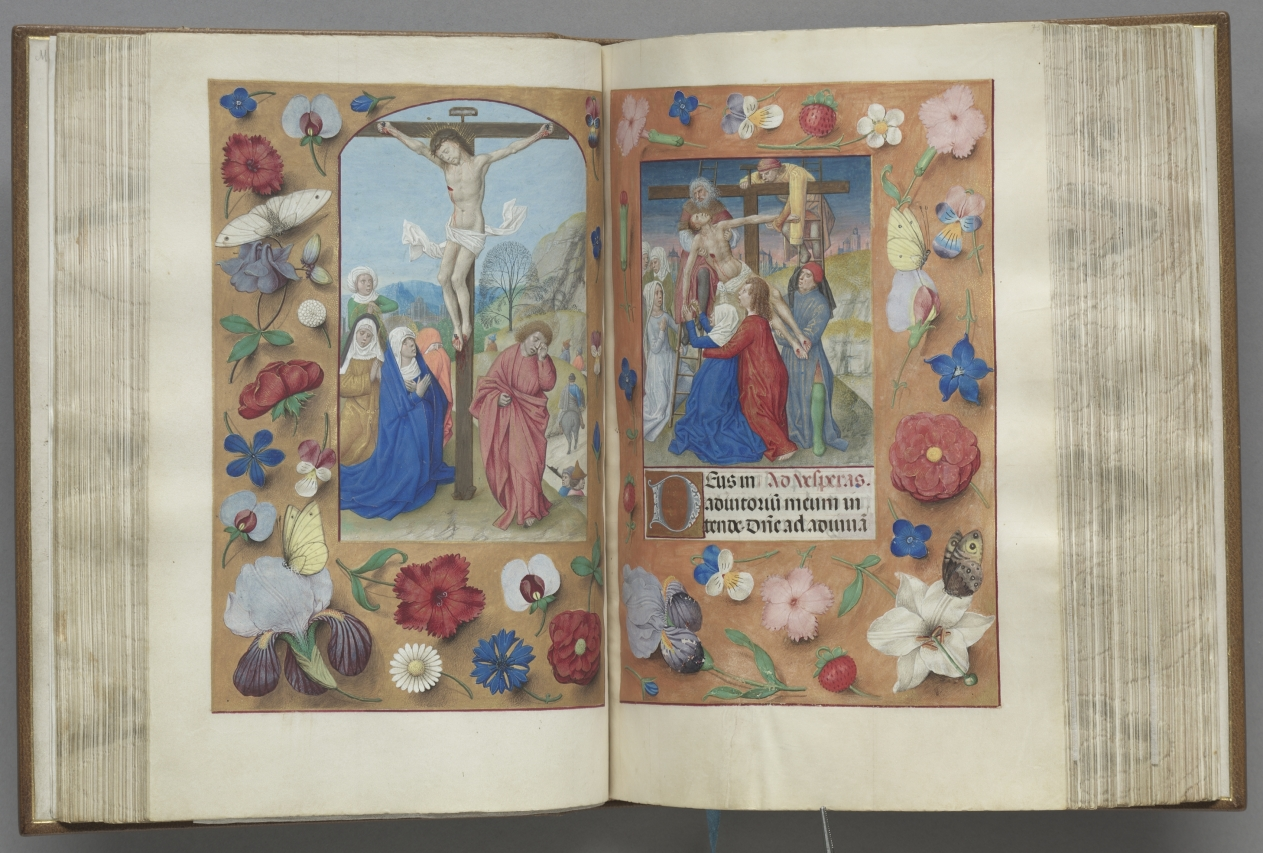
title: Hours of Queen Isabella the Catholic, Queen of Spain: Fol. 72v, Crucifixion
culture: Flanders, Ghent and Bruges, late 15th Century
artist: Master of the First Prayerbook of Maximillian (Flemish, c. 1444–1519)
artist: and Associates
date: c. 1500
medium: ink, tempera, and gold on vellum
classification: Bound Volume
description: This manuscript was illuminated by a circle of at least five highly organized manuscript painters active in the Flemish cities of Ghent and Bruges. The principal illuminator was Alexander Bening, who painted the majority of the book's miniatures. Manuscripts produced by this circle of artists are renowned for the decoration of their borders, which typically feature a rich variety of realistically-painted flowers, birds, and butterflies. This prayer book, called a book of hours, was intended not for a cleric, but for the private devotions of a lay person-in this case, Isabella the Catholic, Queen of Spain (1451-1504). Isabella's coat of arms embellishes the book's frontispiece. It is unlikely that the book was commissioned by the Queen herself; rather, she probably received it as a diplomatic gift from someone courting her patronage, perhaps Cardinal Francisco Jimenez de Cisneros. A Franciscan friar, Jimenez was dependent upon Isabella for his advancement, first to the post of Queen's confessor in 1492, and then to Archbishop of Toledo in 1495.